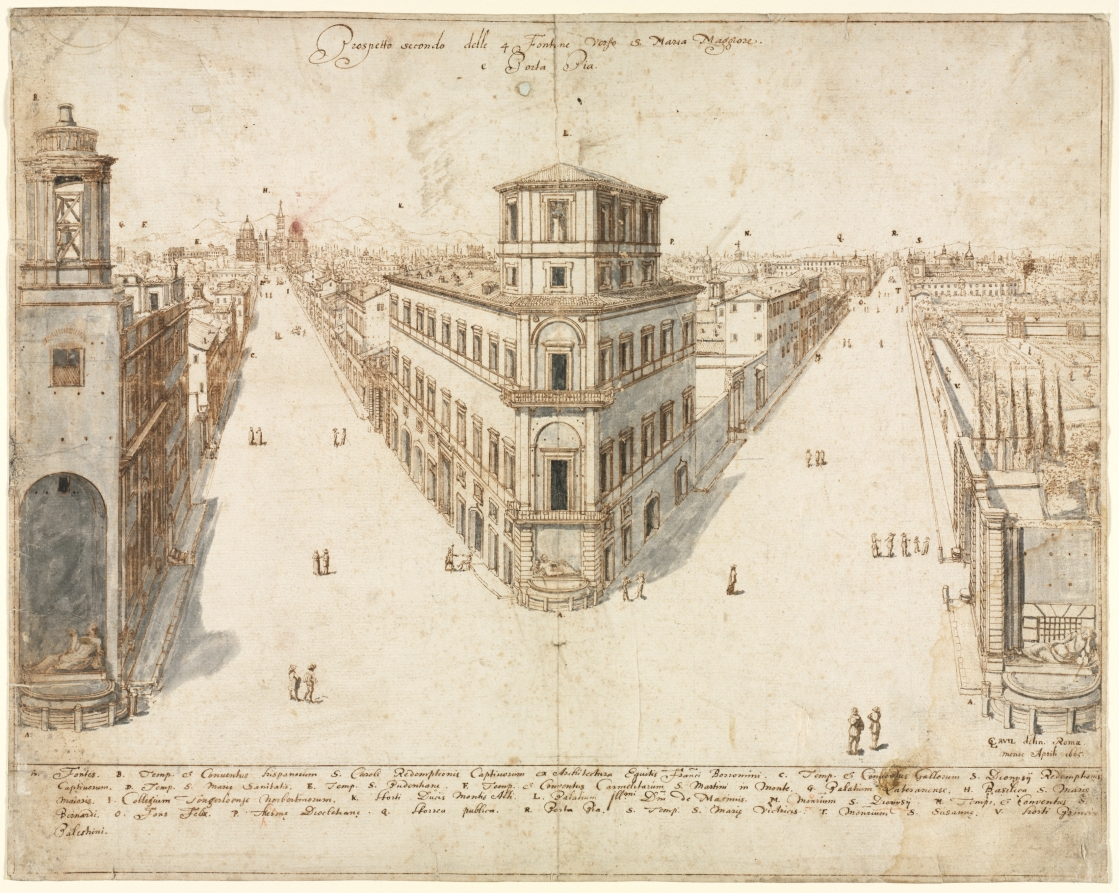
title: Eighteen Views of Rome: The Quattro Fontane Looking Toward Santa Maria Maggiore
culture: Flanders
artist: Lievin Cruyl (Flemish, c. 1640-c. 1720)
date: 1665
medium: pen and brown ink and brush and gray wash over graphite; framing lines in brown ink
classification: Drawing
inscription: signed, lower right, in brown ink: [artist's monogram: LC] RVYL delin: Romæ / mense Aprili 1665. ; by artist, upper center, in brown ink: Prospetto secondo delle 4. Font[a]ne Verso S. Maria Maggiore. / e Porta Pia. ; by artist, throughout composition, in brown ink: [the letters A-V] ; by artist, across bottom, in brown ink: A. Fontes. B. Temp. et Conventus hispaniorúm S. Caroli Redemptionis Captivorum ex Architectura Equitis Frañci Borromini. C. Temp. et Conventus Gallorum S. Dionysij Redemptionis / Captivorum. D. Temp. S. Mariæ Sanitatis. E. Temp. S. Pudentianæ. F. Temp. et Conventus Carmelitarúm S. Martini in Monte. G. Palatium Lateranense. H. Basilica S. Mariæ / Maioris. I. Collegium Tongerloense Norbertinorum. K. Horti Ducis Montis Alti. L. Palatium Illmi.[mi superscript, period beneath m] Dñi de Maximis. M. Moñrium[abbreviation mark in red chalk] S. Dionysij[underlined in red chalk]. N. Temp. et Conventus S. / Bernardi. O. Fons Felix. P. Thermæ Diocletianæ. Q. Horrea publica. R. Porta Pia. S. Temp. S. Mariæ Victricis. T. Moñrium S. Súsannæ. V. Horti Princi [= ?] / Palestrini. ; VERSO, upper left, in brown ink: [illegible] [partially masked] ; ON STRIPS OF PAPER MOUNTED TO VERSO, lower right, in graphite: A20984 ; lower right, in graphite: E. 21